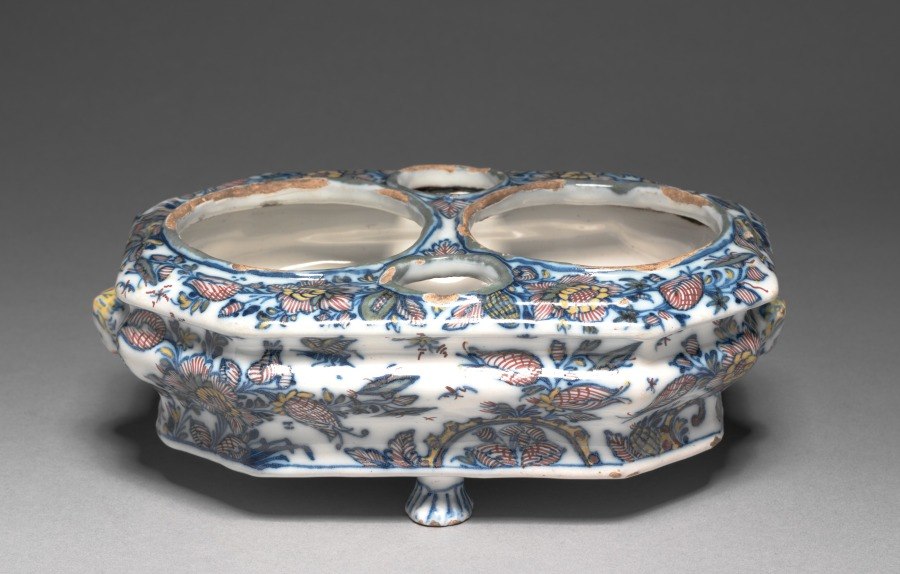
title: Cruet Stand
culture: France, Marseilles, 18th century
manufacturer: Héraud- LeRoy Factory (French)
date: c. 1740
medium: Tin- glazed earthenware (faience) wth underglaze blue decoration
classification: Ceramic